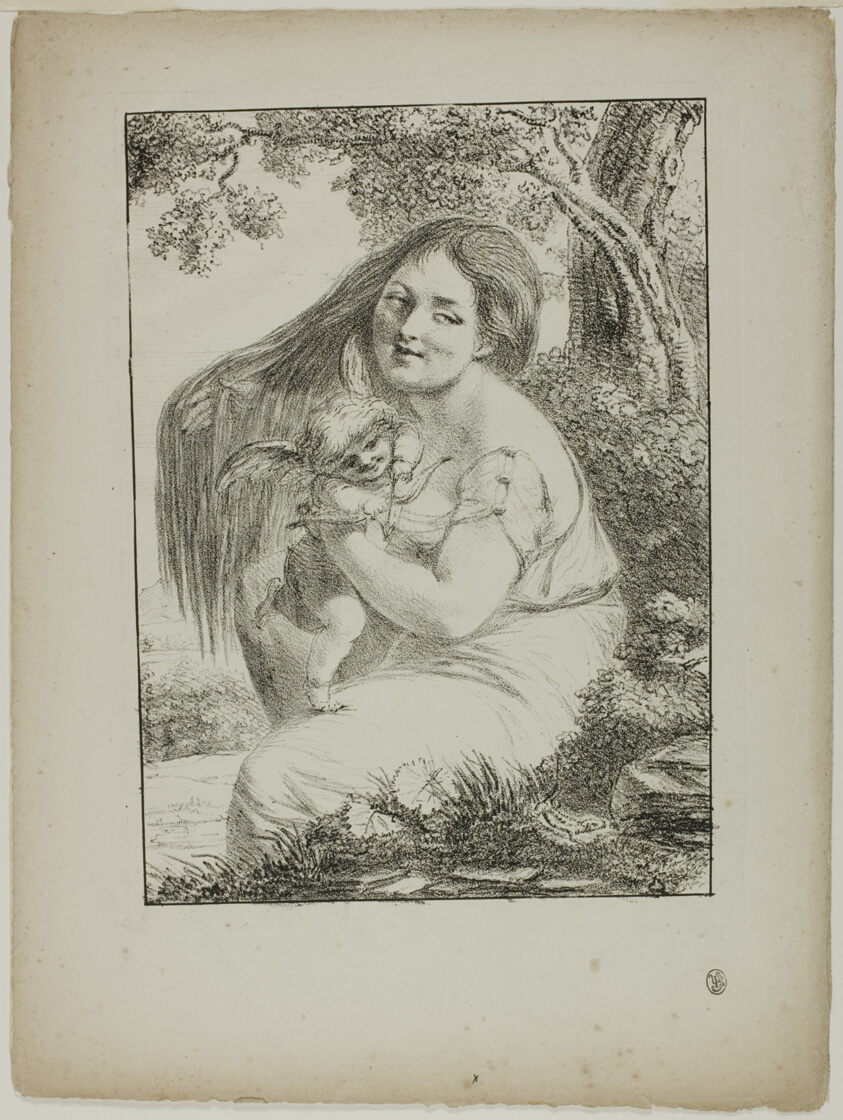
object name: Print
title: Cupid and a Young Woman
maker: Dominique-Vivant Denon (French, 1747-1825)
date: 1817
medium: Lithograph on paper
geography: France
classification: lithograph; print; prints and drawing